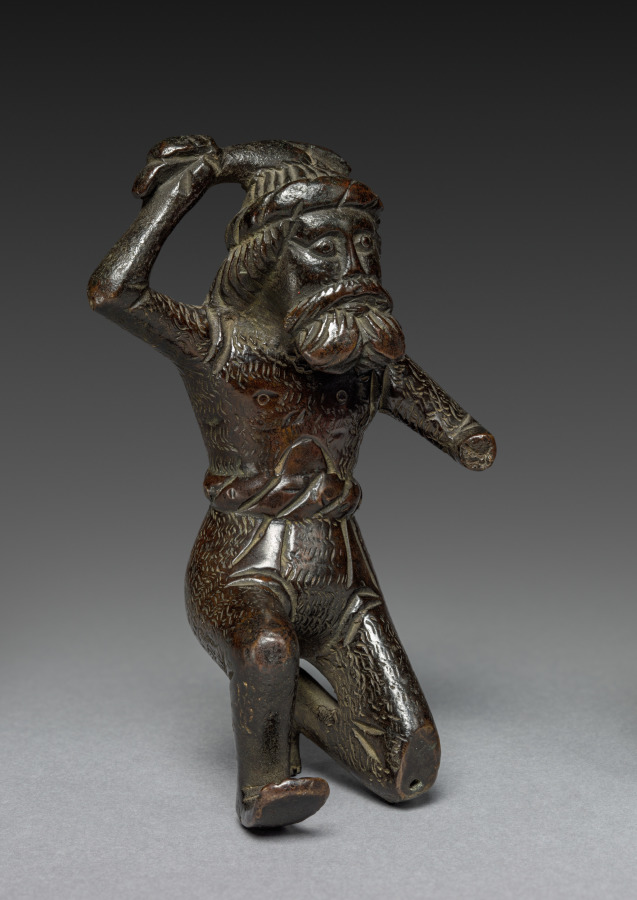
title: Wild Man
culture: Germany, Nuremberg(?)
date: late 1400s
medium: copper alloy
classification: Sculpture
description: Common in medieval art, the wild man is humanlike in appearance with long shaggy hair over his entire body and typically carries a club. Living at the fringe of society in woodland areas, wild men symbolized man in his natural, uncivilized state. Perhaps derived from the part-man part-beast satyr of antiquity, the wild man symbolized lust and aggression in contrast to the spiritual love embodied in medieval chivalry. This bearded version is shown kneeling while raising his right arm holding a club. He wears a twisted cloth circlet on his head and a similar belt at the waist. It has been suggested that this sculpture originally formed part of a suspended candelabra. It may also have served as support for large metal vessels.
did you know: The wild man is derived from the Greek satyr who lived in the woods.